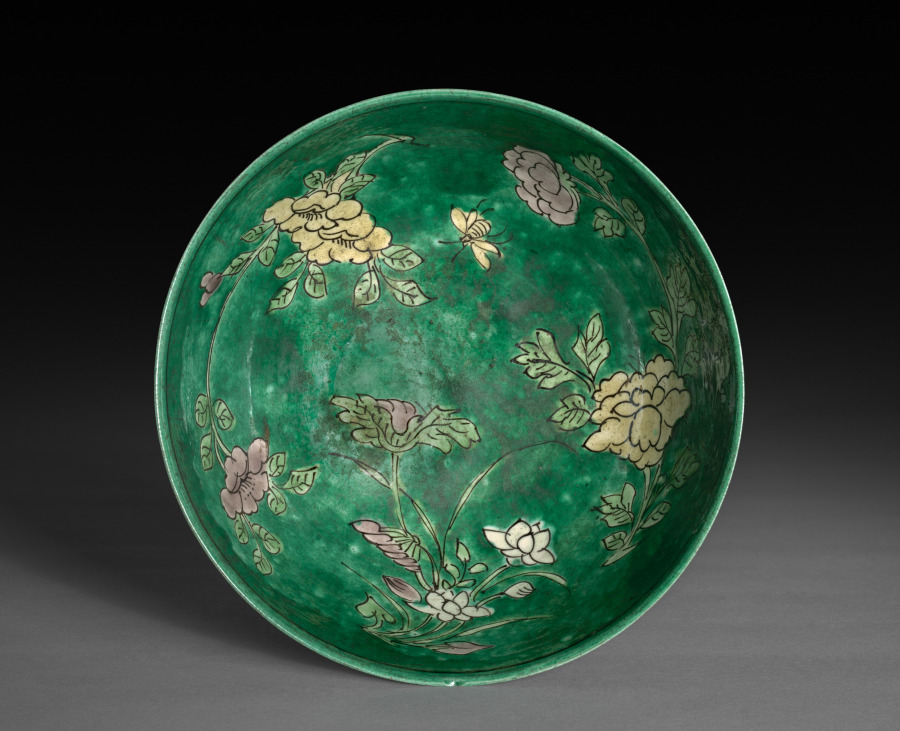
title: Bowl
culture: China, Ming dynasty (1368-1644), Xuande reign (1425-1435)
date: 1426–1435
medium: porcelain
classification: Ceramic